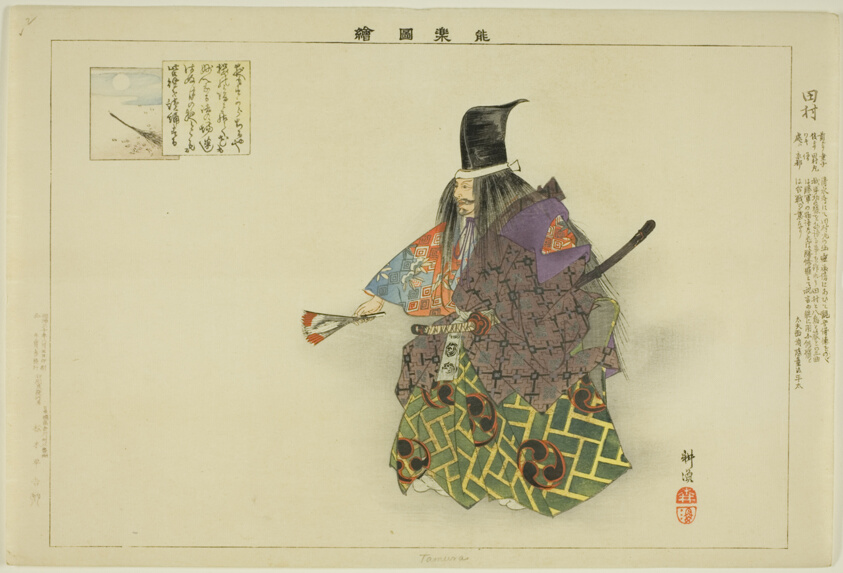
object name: Print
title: Tamura, from the series "Pictures of No Performances (Nogaku Zue)"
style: Japanese (culture or style)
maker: Tsukioka Kogyo; Japanese, 1869-1927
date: 1898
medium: Color woodblock print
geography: Japan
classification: woodblock print; print; asian art